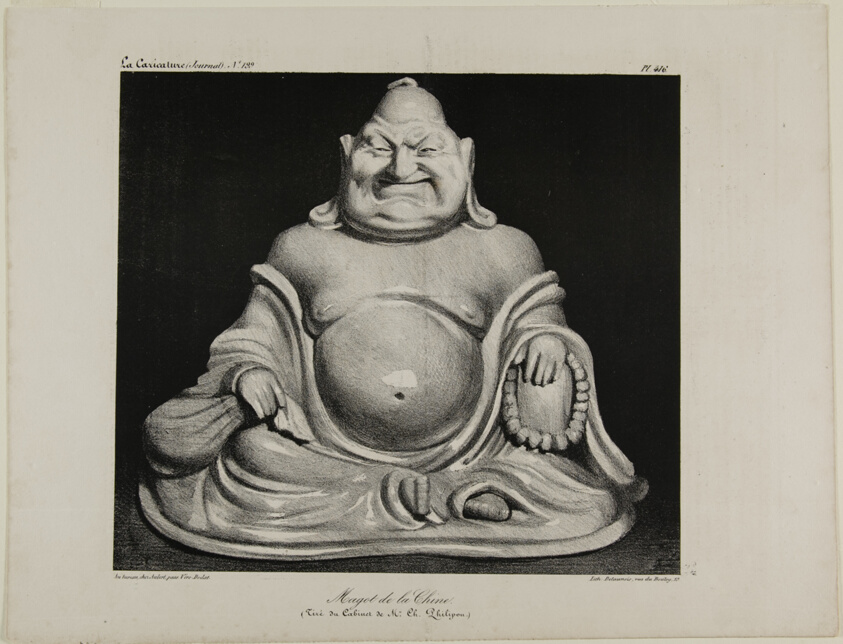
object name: Print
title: Porcelain figure from China (taken from the private collection of Mr. Charles Philipon), plate 416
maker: Honoré Victorin Daumier; French, 1808-1879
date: 1834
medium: Lithograph in black on ivory wove paper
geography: France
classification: lithograph; print; prints and drawing